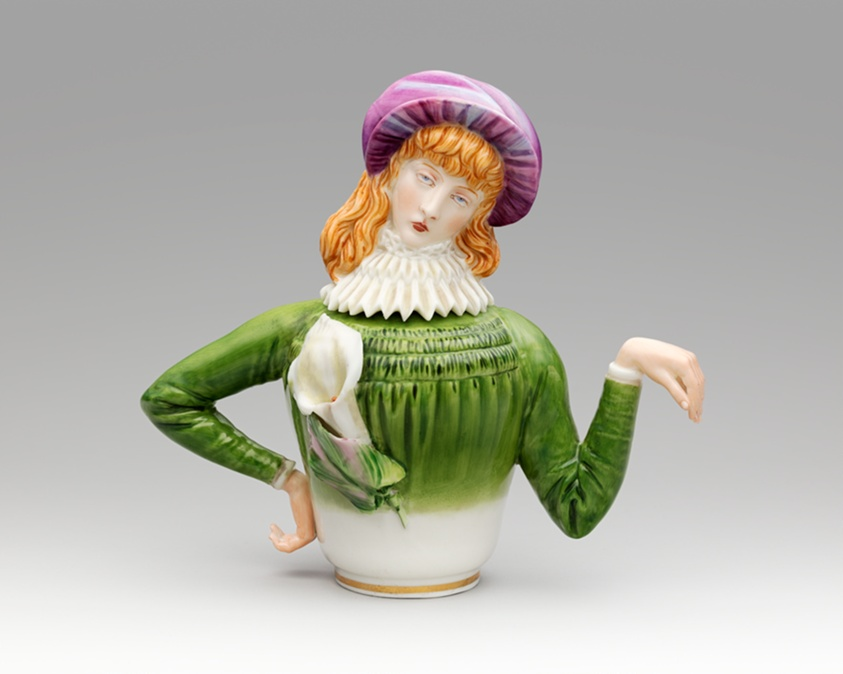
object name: Ceramics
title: Teapot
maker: Designed by James Hadley; English, 1837–1903; Made by the Royal Worcester Porcelain Company; Worcester, England, reorganized 1862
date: 1882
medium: Glazed and enameled Parian ware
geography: England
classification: teapot; ceramics